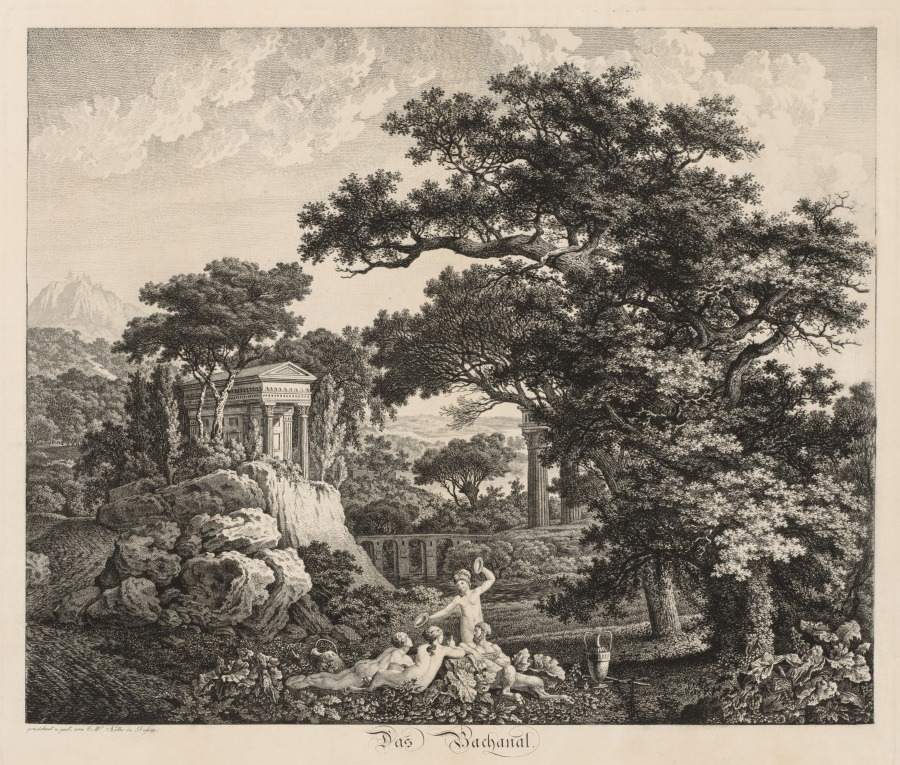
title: Das Bachanal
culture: Germany, 18th-19th century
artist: Carl Wilhelm I Kolbe (German, 1757–1835)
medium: engraving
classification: Print